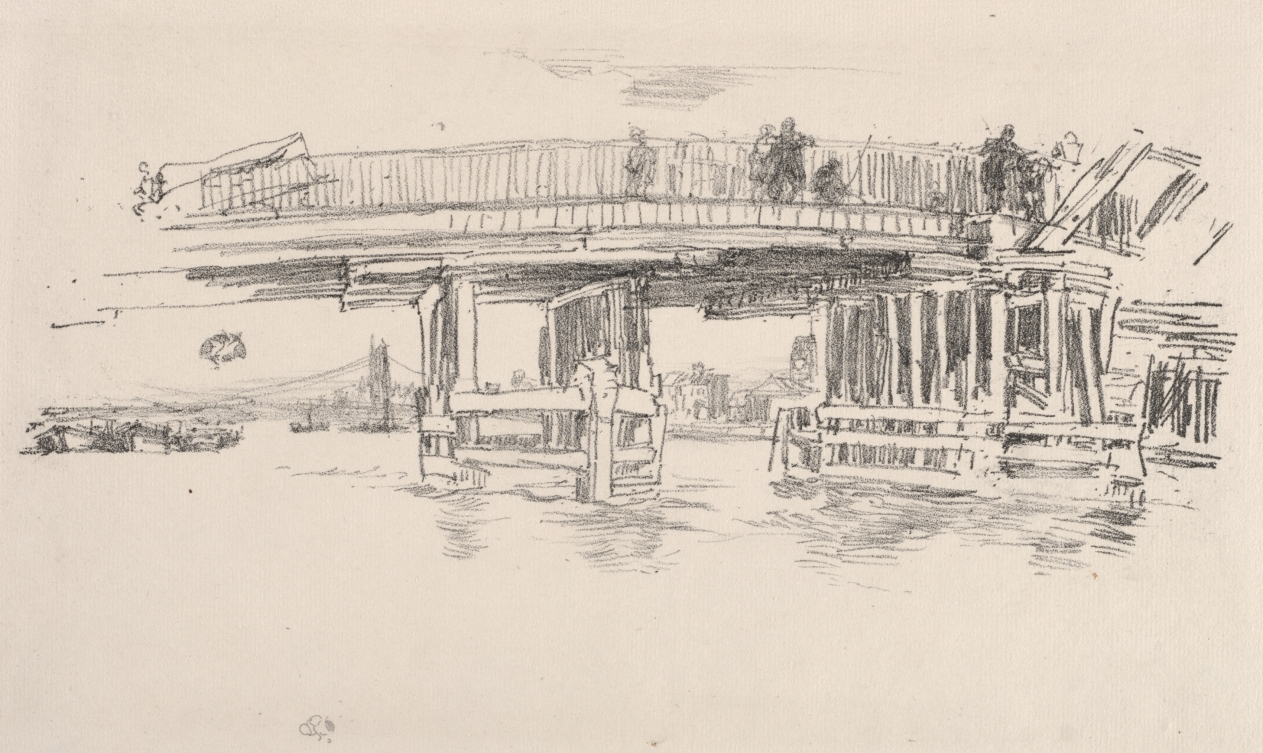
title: Old Battersea Bridge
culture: America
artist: James McNeill Whistler (American, 1834–1903)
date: 1879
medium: lithograph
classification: Print